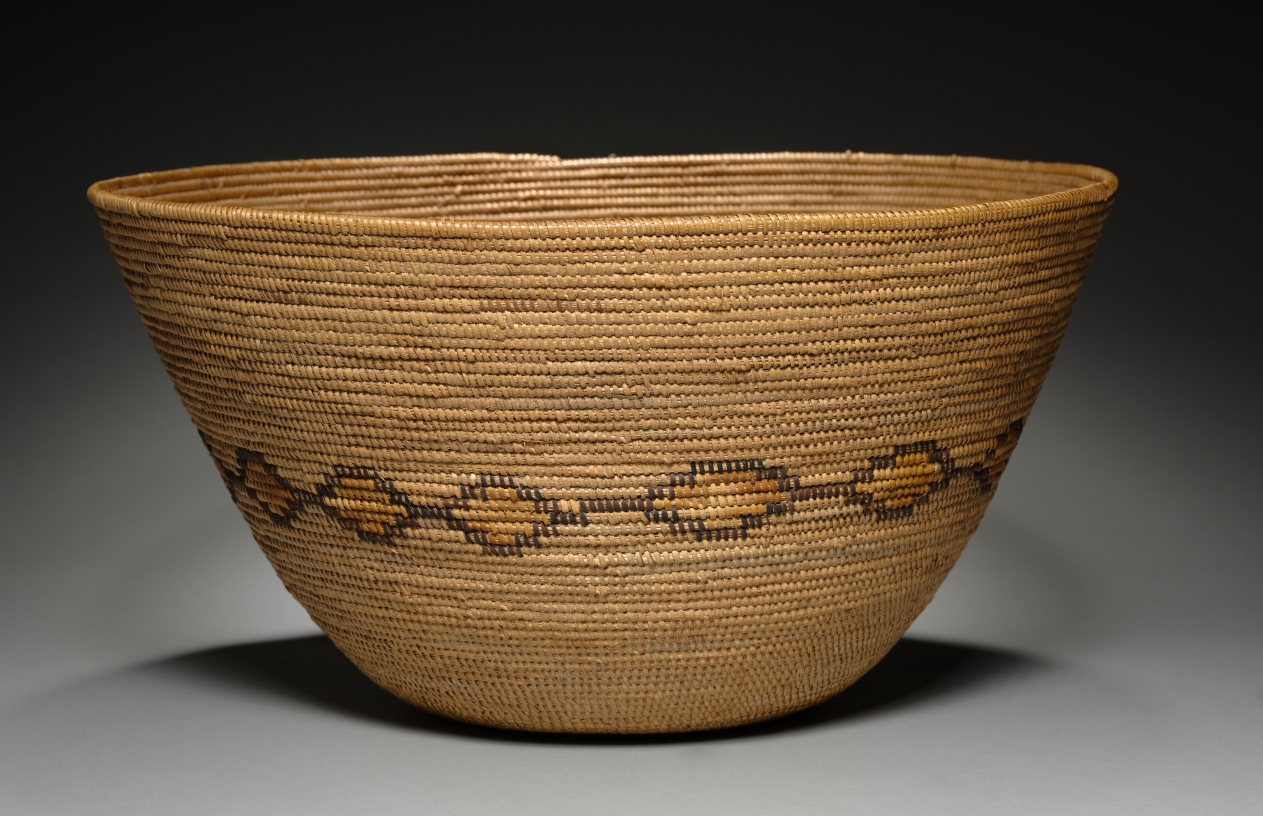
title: Food / Carrying Bowl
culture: California, Southern, Gabrielino (San Gabriel, Mission, or Tongva), 20th century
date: before 1929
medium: coiled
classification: Basketry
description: CMA Bulletin, December 1930